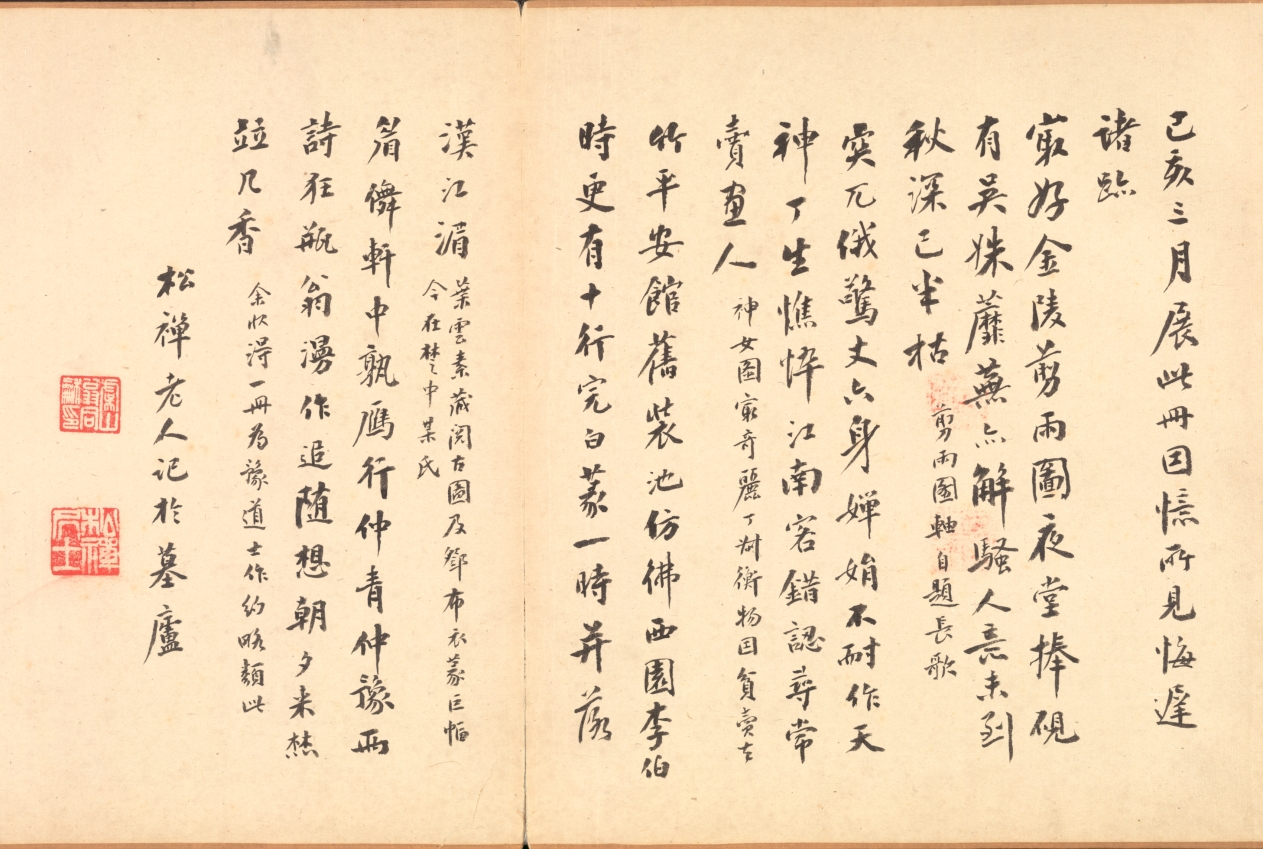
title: Paintings after Ancient Masters: Calligraphy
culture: China, Ming dynasty (1368–1644)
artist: Chen Hongshou (Chinese, 1598/99–1652)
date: 1598–1652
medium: album leaf, ink and color on silk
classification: Painting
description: The twenty paintings in this double album by Chen Hongshou include landscapes, figures, and flowers. It also has one leaf featuring a woman, an often-used subject not found in the other albums from the latter part of his career. His late works are wonderful summations of Chen's peculiar and quirky art—archaistic, hyper-refined—but without accompanying shallowness or sentimentality. His figures and landscapes in the late albums are miniaturized, not unlike the small Chinese gardens, or the carefully selected small table rocks or old roots used for contemplation to see the world in miniature. This loss of scale is quite deliberate and reflects the psychological situation of a depressed class like the Ming loyalist officials and scholars, deprived of their integrity and honor, and forced to lead a diminished and restricted existence.